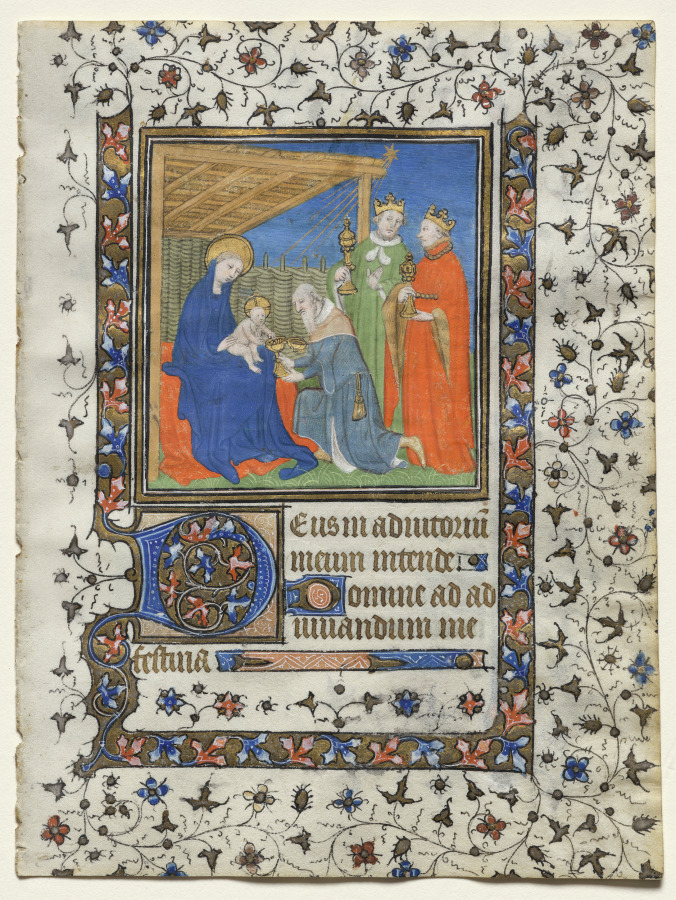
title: Bifolio from a Book of Hours: Adoration of the Magi (recto)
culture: France, Paris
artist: workshop of Boucicaut Master (French, Paris, active about 1410–25)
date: c. 1415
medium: ink, tempera, and gold on vellum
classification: Manuscript